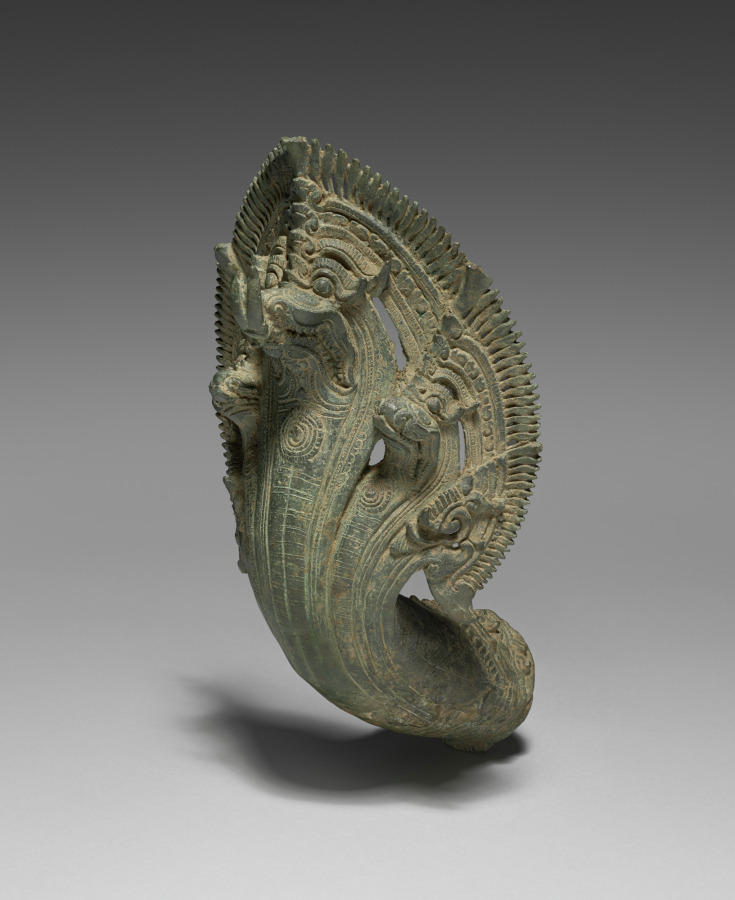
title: Naga Finial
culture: Cambodia, Angkor Wat Period, 12th century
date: 1100s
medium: bronze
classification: Metalwork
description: When members of the royal family or priesthood traveled in a public festival procession or to a temple to make offerings or participate in a ceremony, they would be carried in a palanquin, or a covered litter. Portable objects of veneration, such as bronze images or a sacred fire, were also carried on palanquins. The palanquins had wooden poles, hanging seats or raised platforms, and bronze fittings cast in intricate forms and gilt, lending the palanquins a sumptuous quality. The royal palanquins were typically fitted with multiheaded, serpent-shaped finials at the ends of the poles and corners of the elevated platforms. Naga means serpent in Sanskrit, a language from India selectively appropriated by the Khmer in Cambodia. In their own indigenous mythology, the Khmer people trace their descent from a naga princess and a prince from the island of Java who journeyed to Cambodia. The naga remains a potent emblem for the Khmer nation to this day; it is ubiquitous on Cambodian monuments.